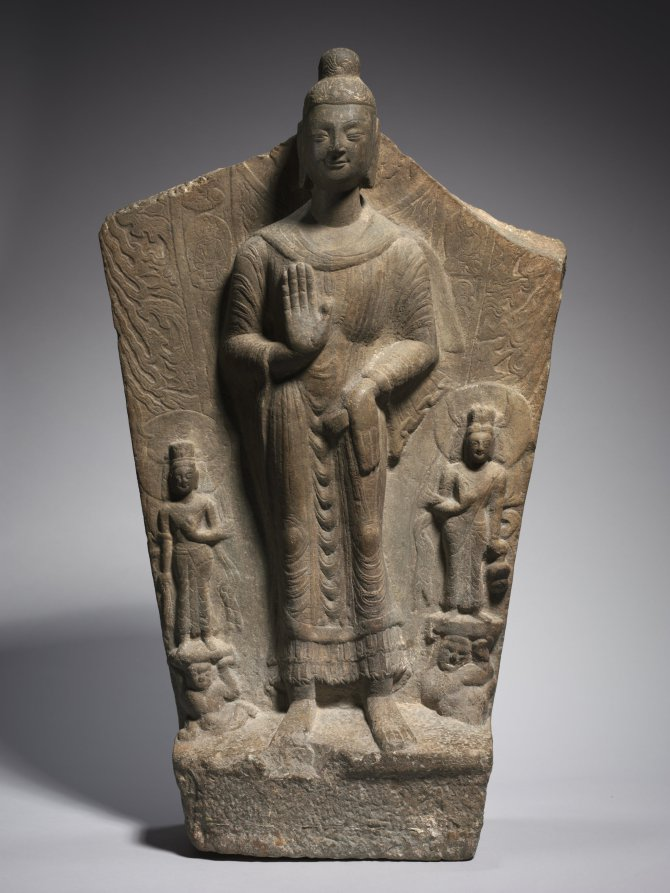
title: Stele with Maitreya and Attendants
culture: China, Northern Wei dynasty (386-534)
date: 500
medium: gray limestone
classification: Sculpture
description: Buddhist statue steles (zaoxiang bei) were commissioned and donated to be set in temples. The making of Buddhist images allowed for personal devotion and accumulation of merits, but the erection of a stele was also an act of piety or gratitude by individual donors. As indicated by the inscription on the reverse side of this stele, it was commissioned in 500 by a monk for his parents, family, and religious teachers.